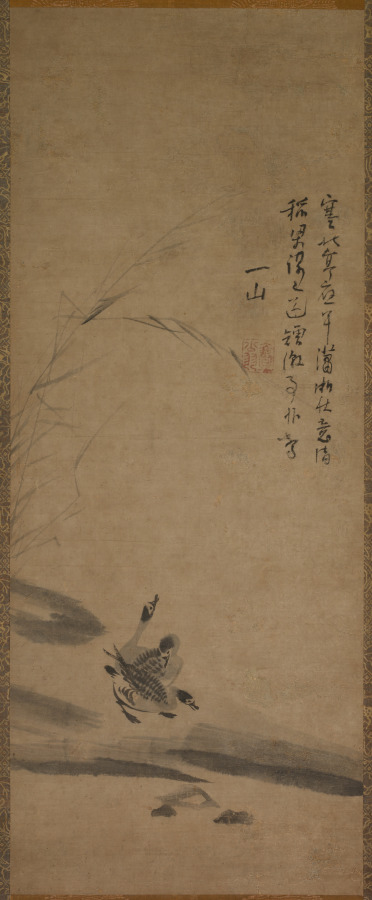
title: Reeds and Geese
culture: Japan, Kamakura period (1185–1333)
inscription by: Yishan Yining [Issan Ichinei] (Chinese, 1247–1317)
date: 1314–17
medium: hanging scroll; ink on paper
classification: Painting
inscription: signed: Issan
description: Reeds and geese has been a common pairing in Chinese literary and visual culture for many centuries. This painting presents the contribution of a Japanese amateur painter, almost certainly a Zen Buddhist monk, to Japan’s fledgling efforts to add the theme to its own cultural vocabulary in the early 1300s. As was customary at the time in Japan, the painter did not sign or seal his work; the inscription, a poem added to the painting by the eminent émigré monk Yishan Yining, along with his signature and seal, was of far greater cultural value. Today, the modestly sized painting has tremendous significance as one of the earliest surviving examples of Japanese ink paintings with reeds and geese.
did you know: Tokyo National Museum owns a copy of this painting made by Kano Gyokusen (1796–1864) when he was 14 years old.